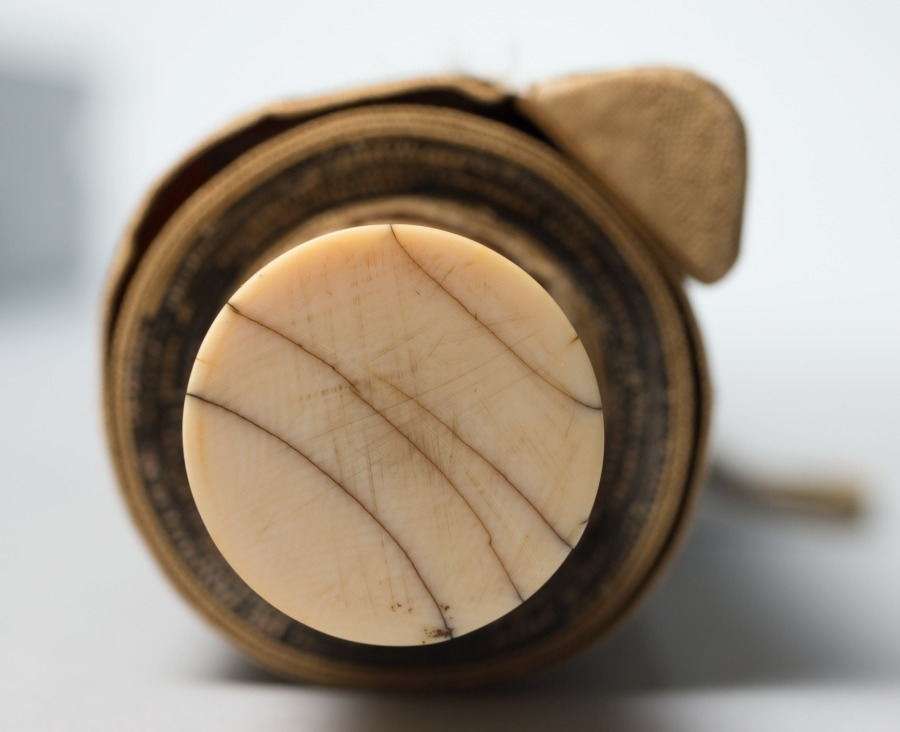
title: White-Robed Guanyin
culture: China, Yuan dynasty (1271-1368)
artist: Jueji Yongzhong (Chinese, active around 1300)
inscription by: Zhongfeng Mingben (Chinese, 1263–1323)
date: late 1200s–early 1300s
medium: hanging scroll; ink on paper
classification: Painting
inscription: Artist's signature: Huanzhu Yongzhong. Inscription by Zhongfeng Mingben: The right thinking [Samkalpa] is embodied within His deep meditation on the Buddha [naga-samadhi]. Retaining not even one single object of thought, A perfect harmony was wonderfully achieved. In the endless time and space, His all-embracing compassion prevails. [signed] Mingben of Huanzhu paying his respects.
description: Guanyin, the bodhisattva of infinite compassion (Avalokiteshvara, in Sanskrit), reveals himself in many forms. According to Buddhist belief, one such manifestation is the white-robed Guanyin sitting on a rock on the island of Putuo (Potalaka, in Sanskrit), located along the coast not far from Ningbo, in Zhejiang Province, China. Here, the figure was swiftly drawn in only a few ink lines. The inscription above is by Zhongfeng Mingben, perhaps the most widely respected and influential Chan (Zen in Japanese) master in the Yuan dynasty. The artist’s signature is a single line below on the left: Huanzhu Yongzhong.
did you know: The CMA collection includes a drawing by a Japanese priest, CMA 1978.47.2, inspired by this composition.